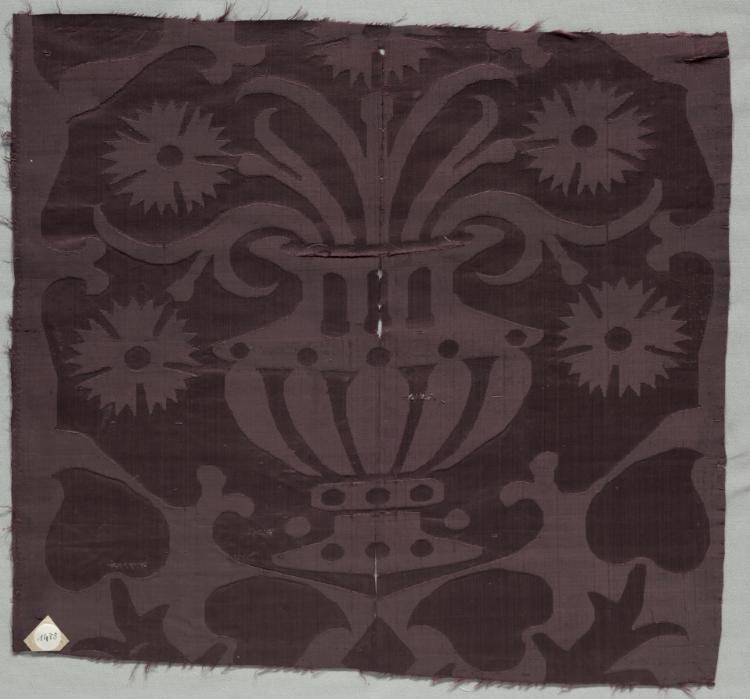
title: Fragment of Silk Damask Textile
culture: Italy or Spain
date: 1500s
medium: damask, silk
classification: Textile